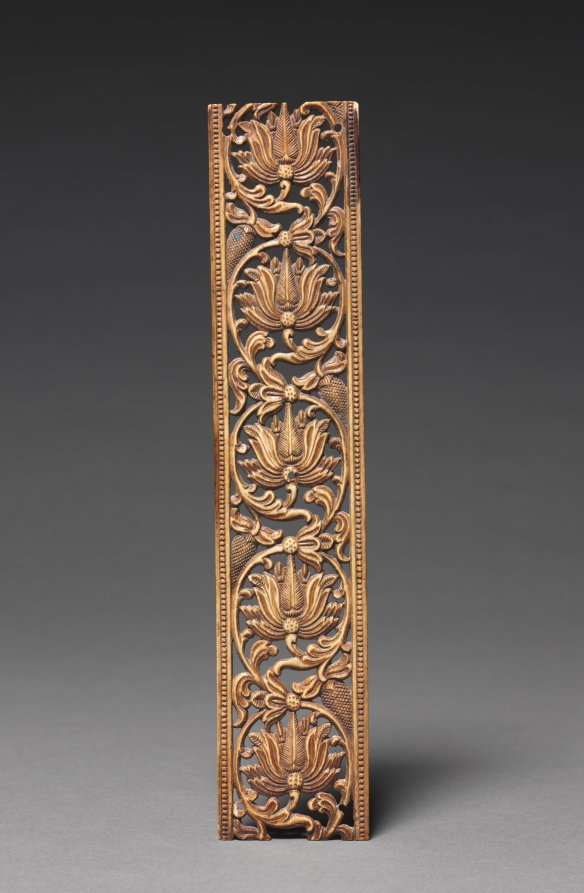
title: Cover of a Palm Leaf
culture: South India, 18th century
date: 1700s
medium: ivory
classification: Ivory